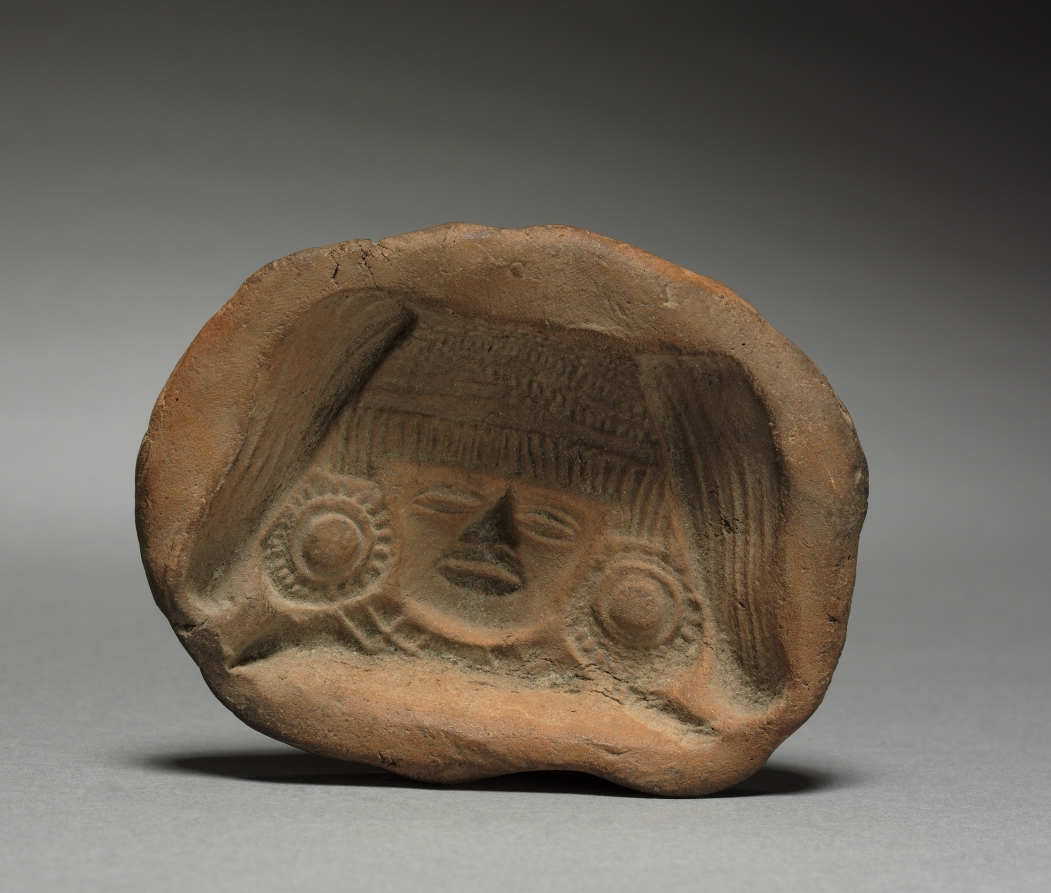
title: Mold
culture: Mexico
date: 1–1500 CE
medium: pottery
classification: Ceramic